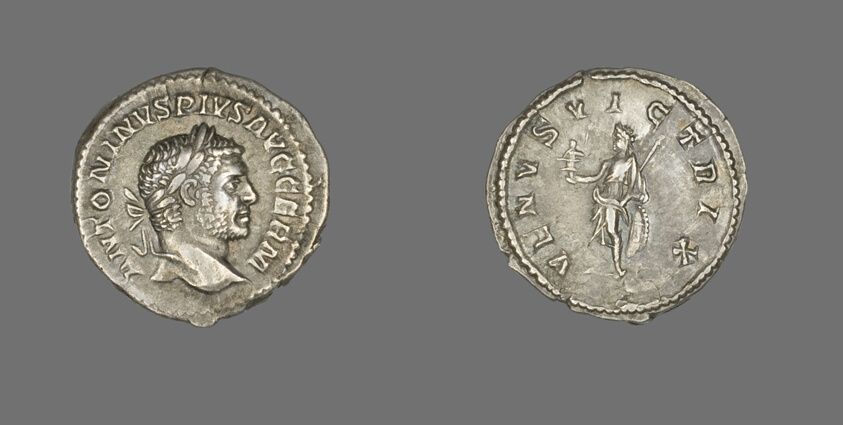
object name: Coin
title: Denarius (Coin) Portraying Emperor Caracalla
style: roman (ancient, style or period)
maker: Roman, minted in Rome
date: 213-217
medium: Silver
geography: Roman Empire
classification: coin; ancient art